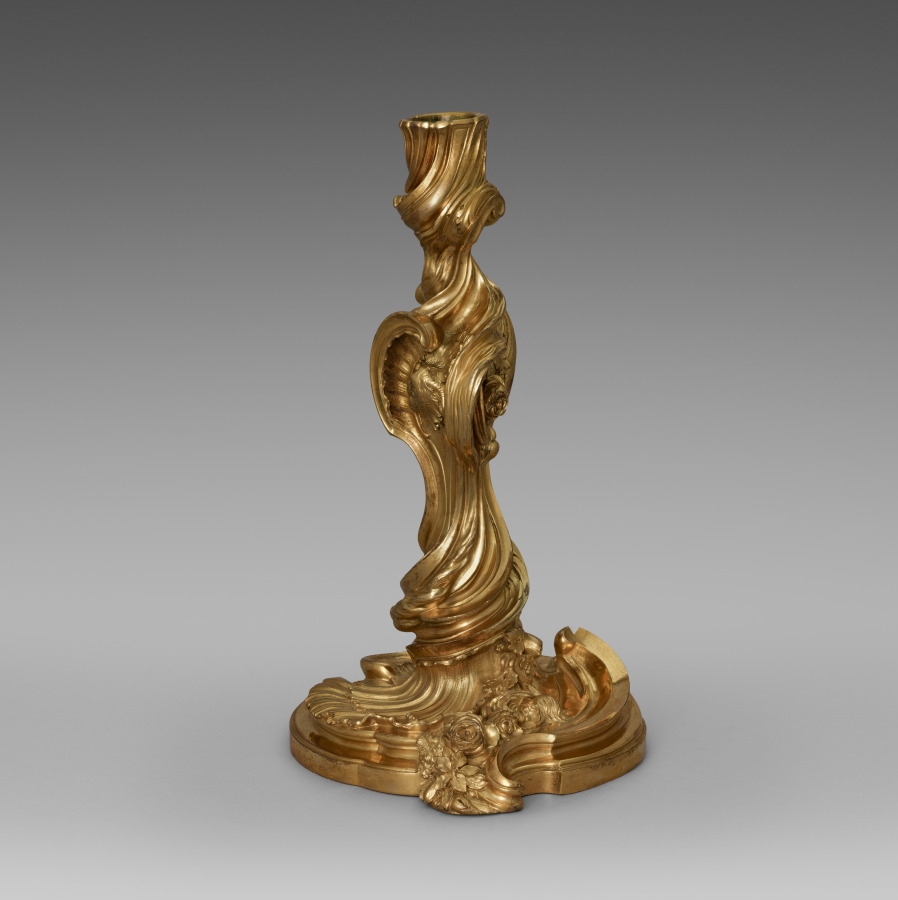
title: Candlestick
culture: France, 18th century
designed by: Juste-Aurèle Meissonnier (French, 1695–1750)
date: c. 1740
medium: gilt metal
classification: Furniture and woodwork